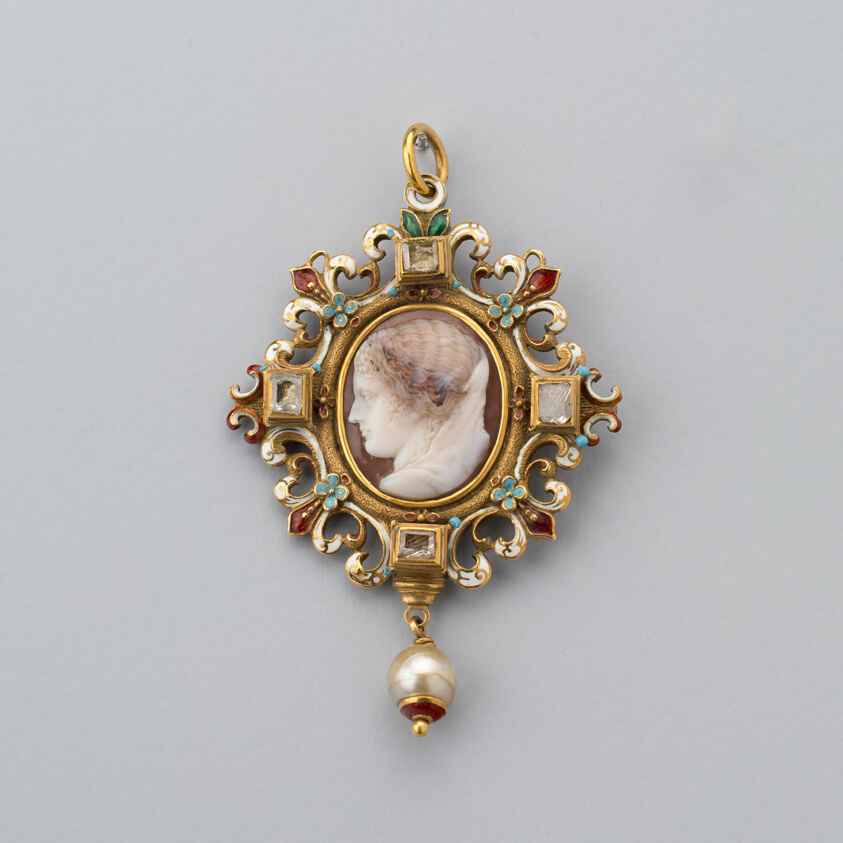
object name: Costume and Accessories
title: Two-Sided Pendant with Cameo showing Juno and Minerva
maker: European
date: 19th century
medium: Cameo: agate Frame: enamel, gold, diamonds, and pearl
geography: Europe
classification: pendant (jewelry); jewelry; european decorative arts; costume